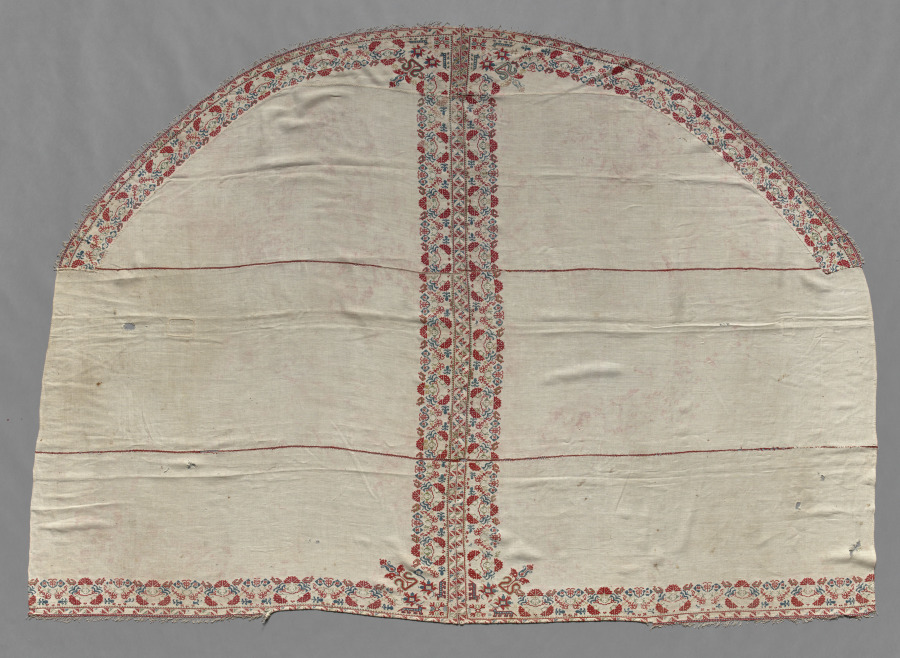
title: Part of a Bedspread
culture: Greece, Ionian Islands, 18th century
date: 1700s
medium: embroidery: silk on linen tabby ground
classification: Embroidery